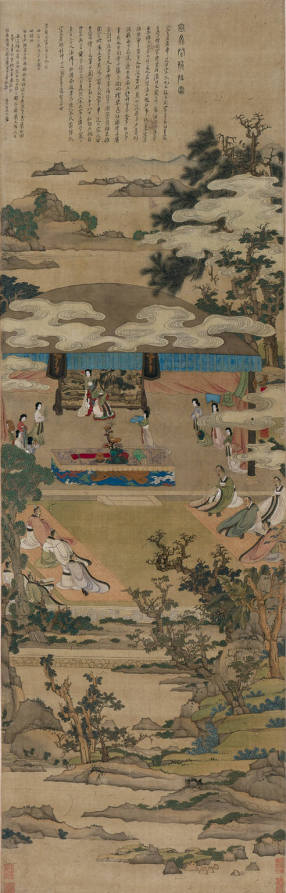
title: Lady Xuanwen Giving Instruction on the Rites of Zhou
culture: China, Ming dynasty (1368–1644)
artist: Chen Hongshou (Chinese, 1598/99–1652)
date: 1638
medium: Hanging scroll; ink and color on silk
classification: Painting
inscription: 宣文君者韋逞母宋氏也。父授以周官音義，曰：吾家世學傳周官。傳業相繼。此又周公所製，經紀〔典〕誥百官品物備於此矣。女可受之。君諷誦不輟。石帝徙山東。君乃推鹿車，背負父所授書到冀州。逞時年少。晝則採樵，夜則教逞。逞遂學成名立。仕符堅為太常。堅常幸其太學，問博士經典。乃憫禮樂遺缺。時博士盧壺對曰：廢學既久，書傳零落。比年綴撰，正經粗集。惟周官、禮經，未有其師。竊見太常韋逞母宋氏世學家，女傳其父業。得周官音義。今年八十。視聽無闕。非此母無可傳授後生。于是就宋氏家立講堂，置生員百二十人。隔絳紗縵而授業焉。拜宋氏爵，號為宣文君。賜侍婢十人。周官學後行于世。 崇禎戊寅八月二日，為綬姑六旬之辰。綬弟自成為姑偦。偕姑季女駱密、外孫楹、楠、楩、橒、楞、棅、孫女惠、漉酒上壽，屬綬圖寫，所以頌祝者。綬思宋母尚五胡之時，經藉屬之婦人；今太平有象，而秉杖名義者，獨綬姑爾。敬寫此圖，且厚望于弟紹焉。猶子洪綬九頓首。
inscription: 5 additional seals: 2 of Xu Weiren 徐渭仁(1788－1855); 2 of Sun Zutong 孫祖同 (1894–1937); 1 of C. C. Wang 王季遷 (1907–2003).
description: This painting by Chen Hongshou depicts the story of Xuanwen Jun, or Lady of Literary Propagation, at a venerable age, instructing young scholars on the Confucian classics. It was painted for Chen’s aunt in celebration of her 60th birthday. Chen’s painting style is archaic in the use of fine outlines and brilliant coloring with mineral pigments. In depicting the figures, he uses the “iron-wire” brush style (fine, even lines) with deliberate control. The faces are elongated and exaggerated. A few ritual bronzes lend the scene an antique flavor.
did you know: Chen Hongshou's long inscription at the top of the painting compares his virtuous aunt with the historical exemplar, Lady Xuanwen.